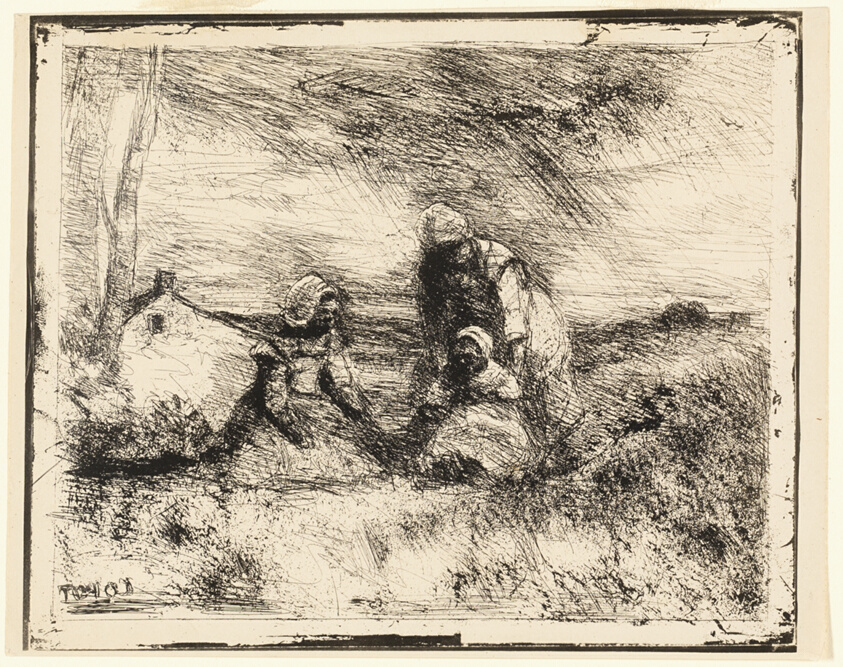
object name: Print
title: Little Sister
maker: Jean-Baptiste-Camille Corot; French, 1796-1875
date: 1854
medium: Cliché-verre on ivory photographic paper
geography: France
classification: cliché-verre; print; prints and drawing